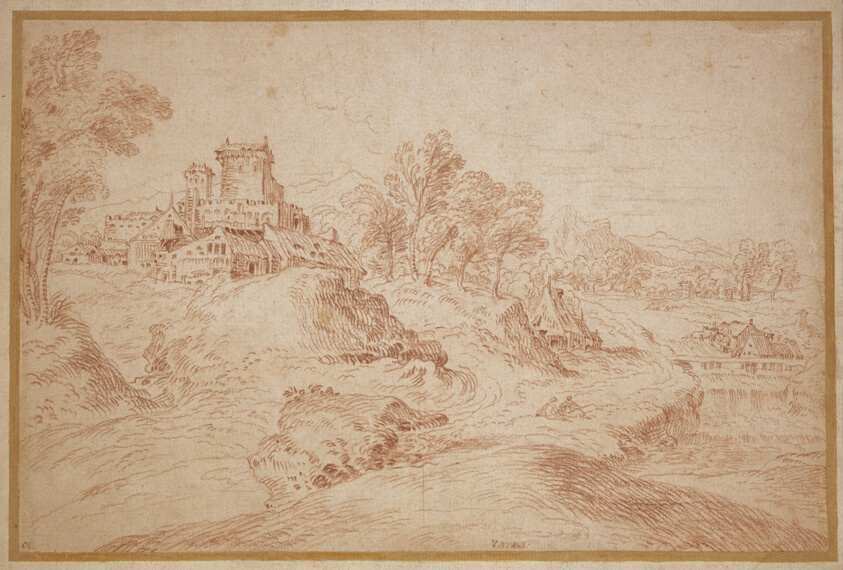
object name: Drawing and Watercolor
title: Landscape with a Castle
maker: Jean Antoine Watteau (French, 1684-1721)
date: 1716/18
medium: Red chalk on buff laid paper, laid down on cream laid card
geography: France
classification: chalk; drawings (visual works); prints and drawing